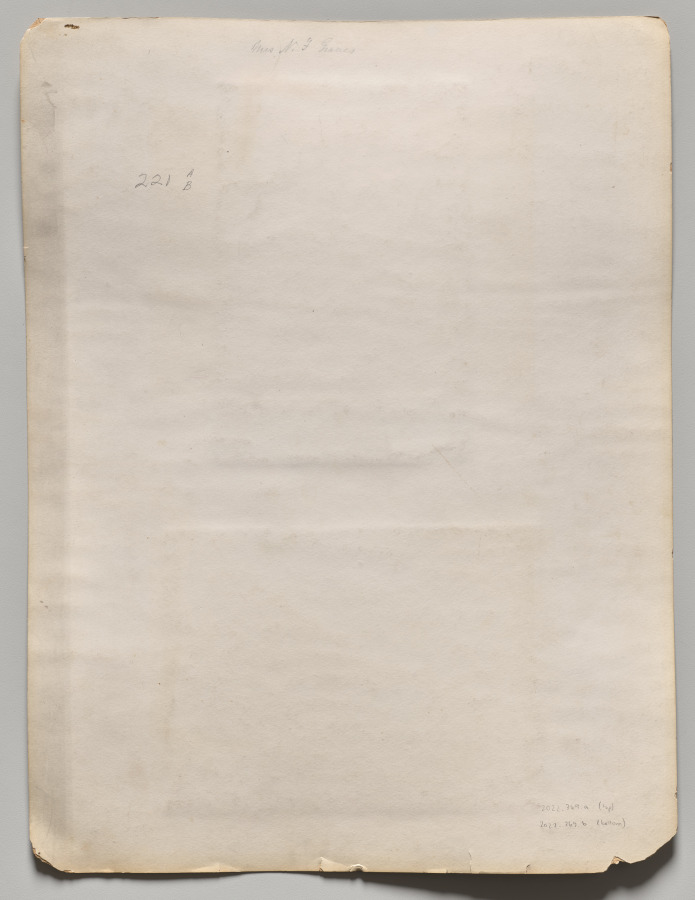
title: Untitled (Jama Masjid, Delhi)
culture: England, 19th century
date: 1870s (?)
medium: 2 albumen prints mounted on an album page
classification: Photograph